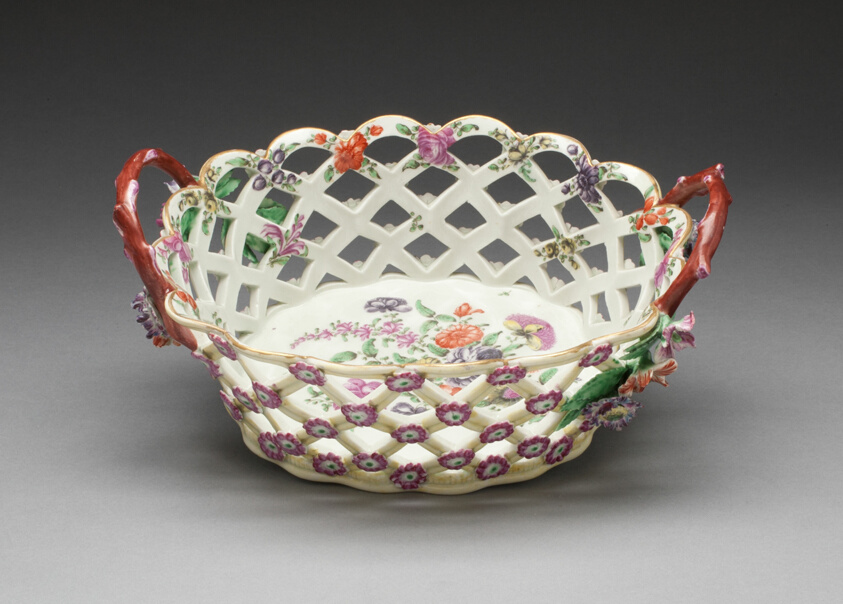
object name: Ceramics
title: Basket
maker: Worcester Porcelain Factory (Warmstry House Period, 1751–1783); Worcester, England, founded 1751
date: c. 1770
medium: Soft-paste porcelain with polychrome enamels and gilding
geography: Worcester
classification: tableware; porcelain; european decorative arts; ceramics